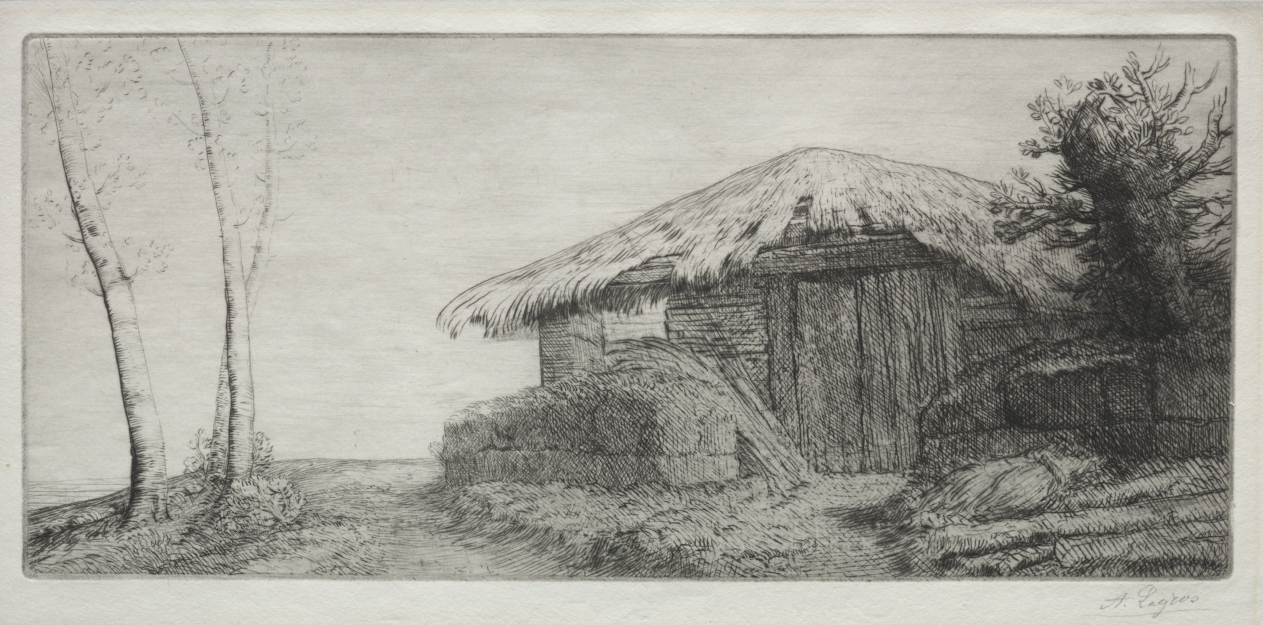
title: Sheepfold on the Hill (Bergerie sur le Coteau)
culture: France, 19th-20th century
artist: Alphonse Legros (French, 1837–1911)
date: c. 1857–1911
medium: etching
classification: Print